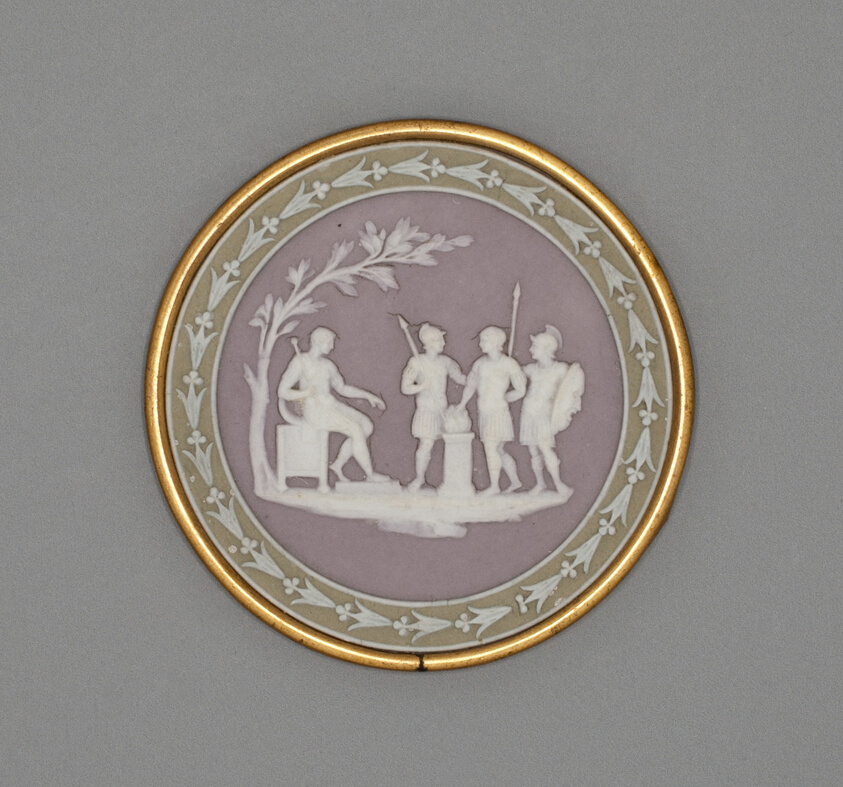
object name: Ceramics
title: Medallion with Sacrifice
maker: Wedgwood Manufactory (England, founded 1759)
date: c. 1780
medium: Stoneware (jasperware)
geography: Burslem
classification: sculpture; stoneware; european decorative arts; ceramics